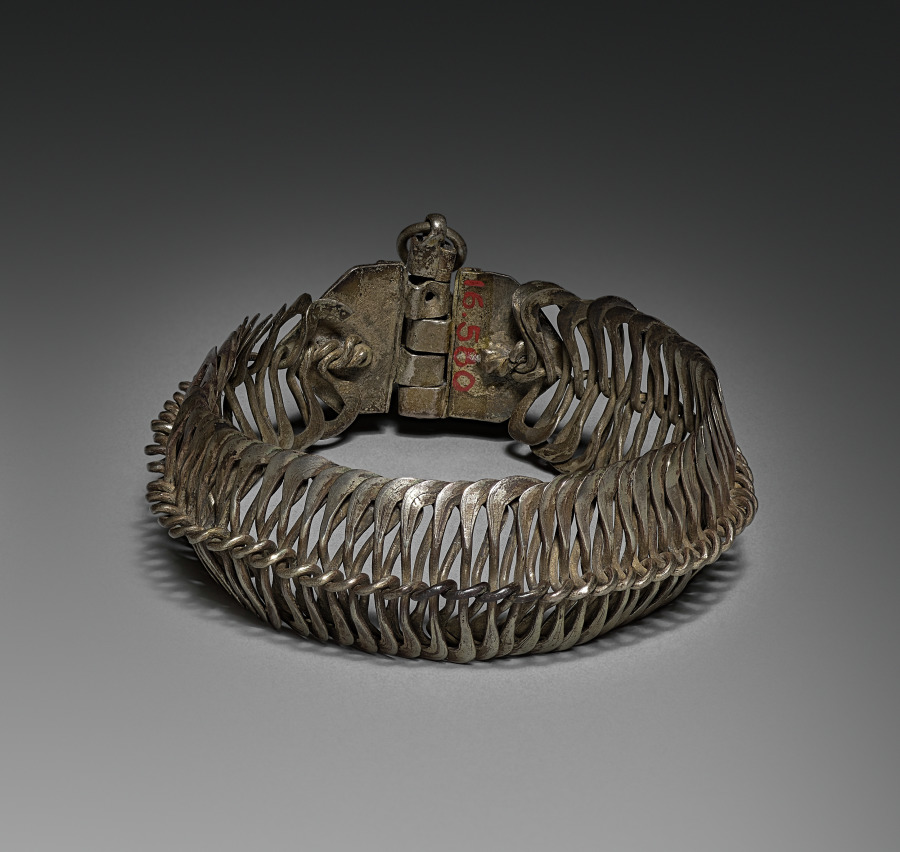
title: Bracelet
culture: India (?)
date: 1800s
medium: silver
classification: Jewelry